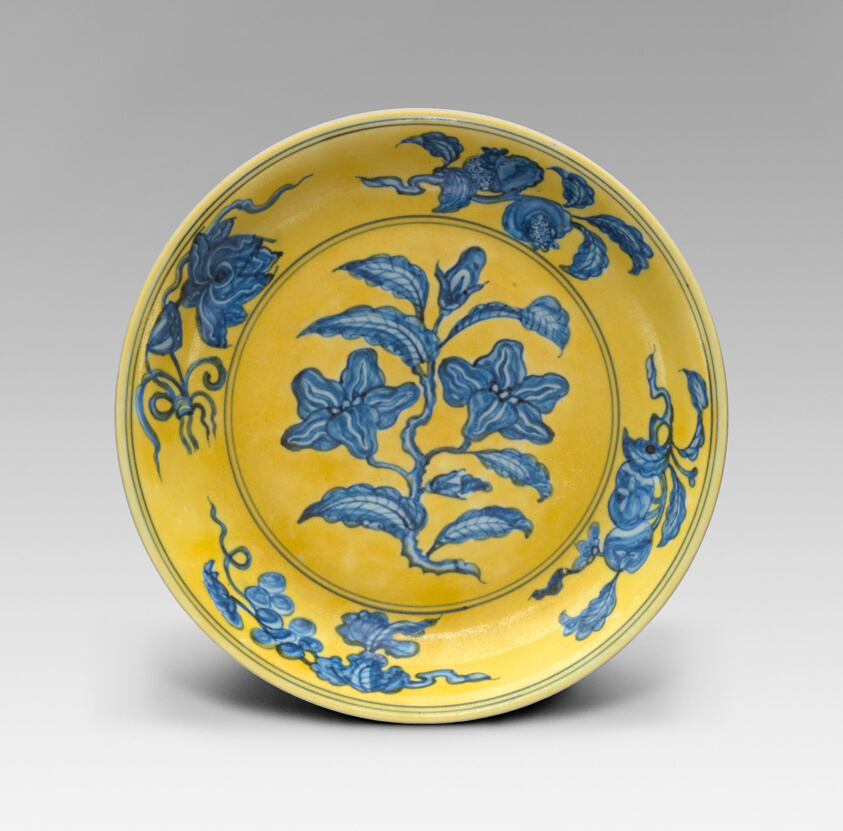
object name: Ceramics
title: Dish with Floral and Fruit Sprays ("Gardenia Dish")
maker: China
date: Ming dynasty, Hongzhi reign mark and period (1488–1505)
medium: Porcelain painted in underglaze blue and overglaze yellow enamel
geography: China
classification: ceramics